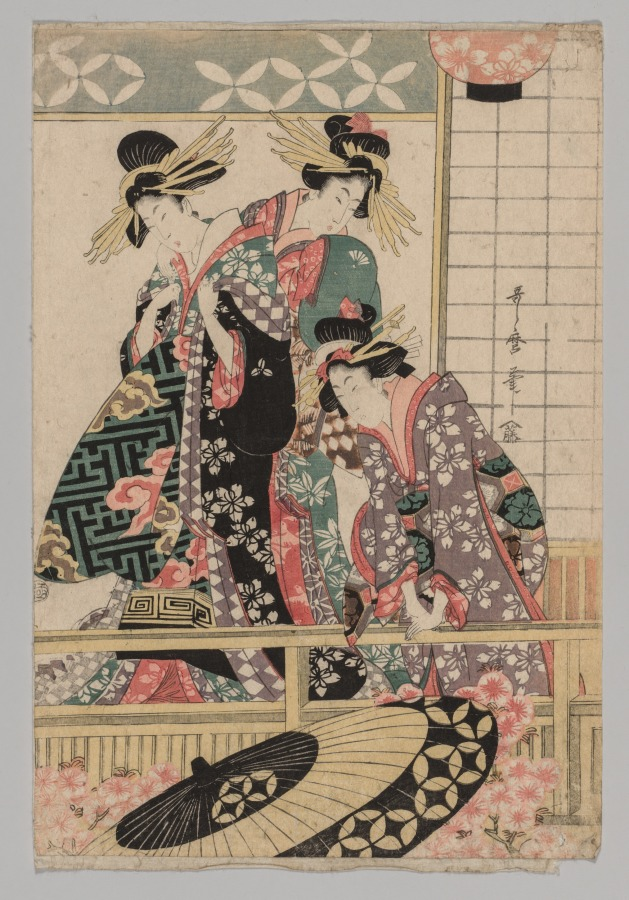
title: Yoshiwara Women Looking into the Street at Springtime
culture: Japan, Edo period (1615–1868)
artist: after Kitagawa Utamaro (Japanese, c. 1754–1806)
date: 1753–1806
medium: color woodblock print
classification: Print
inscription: Signature: Utamaro fude